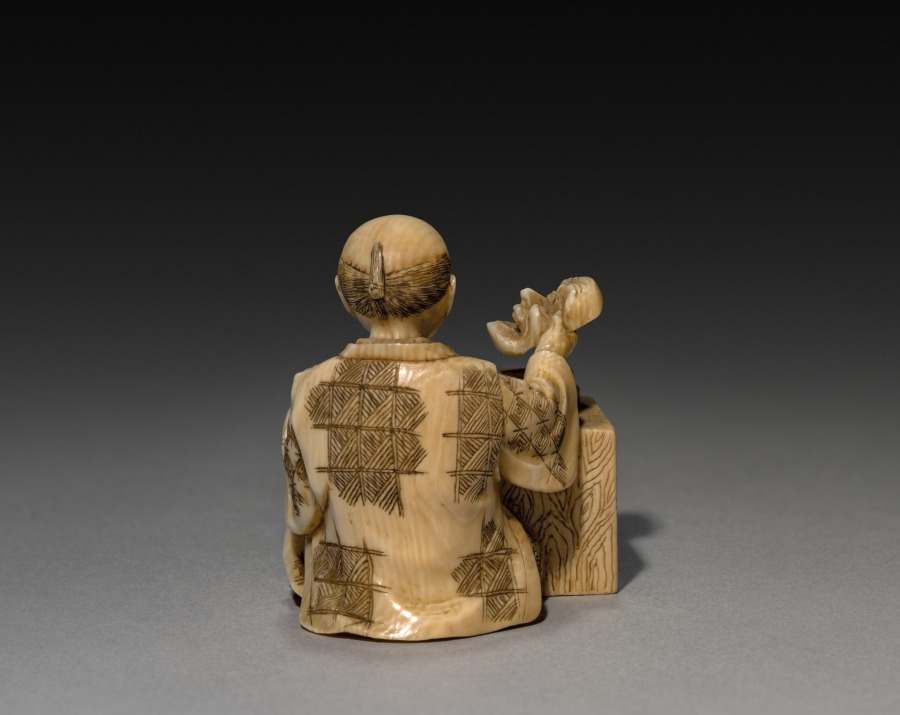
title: The Mask Maker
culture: Japan, Meiji period (1868–1912)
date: late 1800s to early 1900s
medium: ivory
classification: Ivory